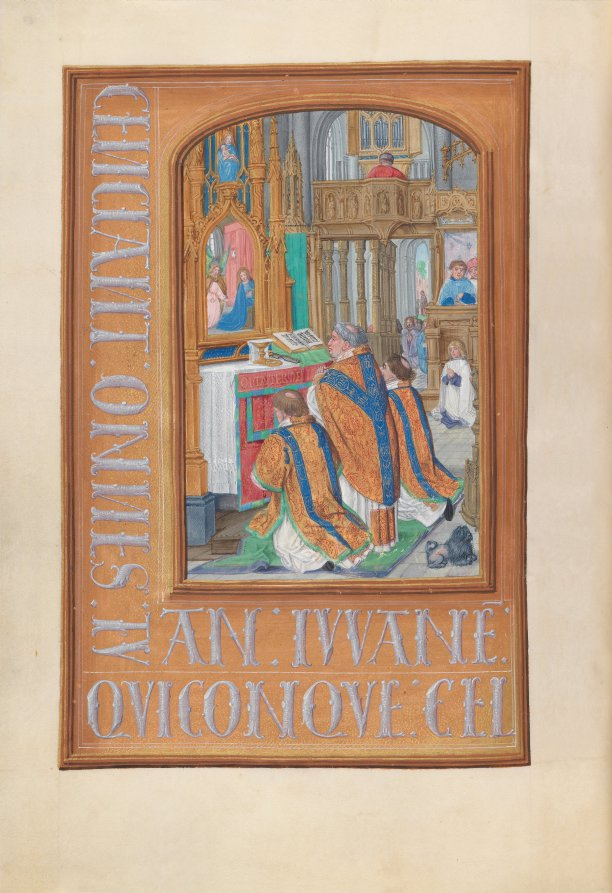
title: Hours of Queen Isabella the Catholic, Queen of Spain: Fol. 87v, Celebration of the Mass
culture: Flanders, Ghent and Bruges, late 15th century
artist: Master of the First Prayerbook of Maximillian (Flemish, c. 1444–1519)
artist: and Associates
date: c. 1500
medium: ink, tempera, and gold on vellum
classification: Bound Volume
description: This manuscript was illuminated by a circle of at least five highly organized manuscript painters active in the Flemish cities of Ghent and Bruges. The principal illuminator was Alexander Bening, who painted the majority of the book's miniatures. Manuscripts produced by this circle of artists are renowned for the decoration of their borders, which typically feature a rich variety of realistically-painted flowers, birds, and butterflies. This prayer book, called a book of hours, was intended not for a cleric, but for the private devotions of a lay person-in this case, Isabella the Catholic, Queen of Spain (1451-1504). Isabella's coat of arms embellishes the book's frontispiece. It is unlikely that the book was commissioned by the Queen herself; rather, she probably received it as a diplomatic gift from someone courting her patronage, perhaps Cardinal Francisco Jimenez de Cisneros. A Franciscan friar, Jimenez was dependent upon Isabella for his advancement, first to the post of Queen's confessor in 1492, and then to Archbishop of Toledo in 1495.